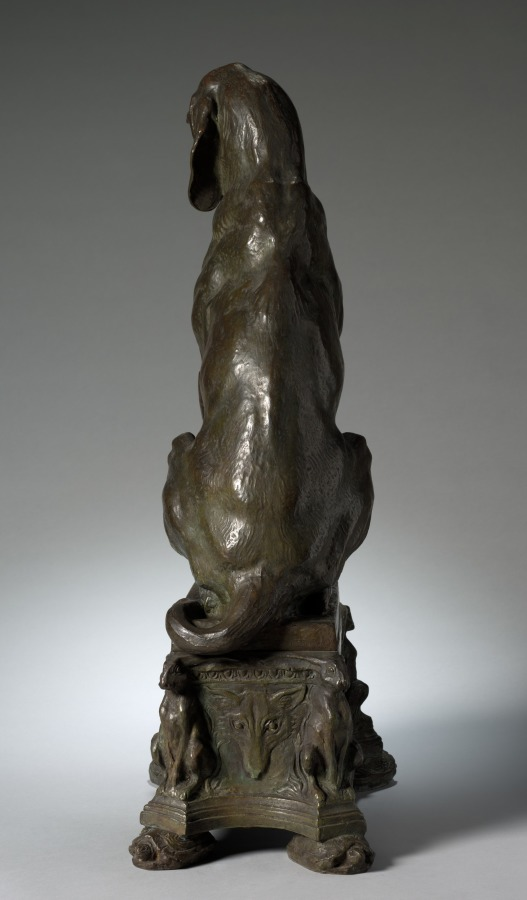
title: Hound (2 of 2)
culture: America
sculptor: Charles Cary Rumsey (American, 1879–1922)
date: 1912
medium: bronze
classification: Sculpture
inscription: Signed on plinth: © C. C. Rumsey